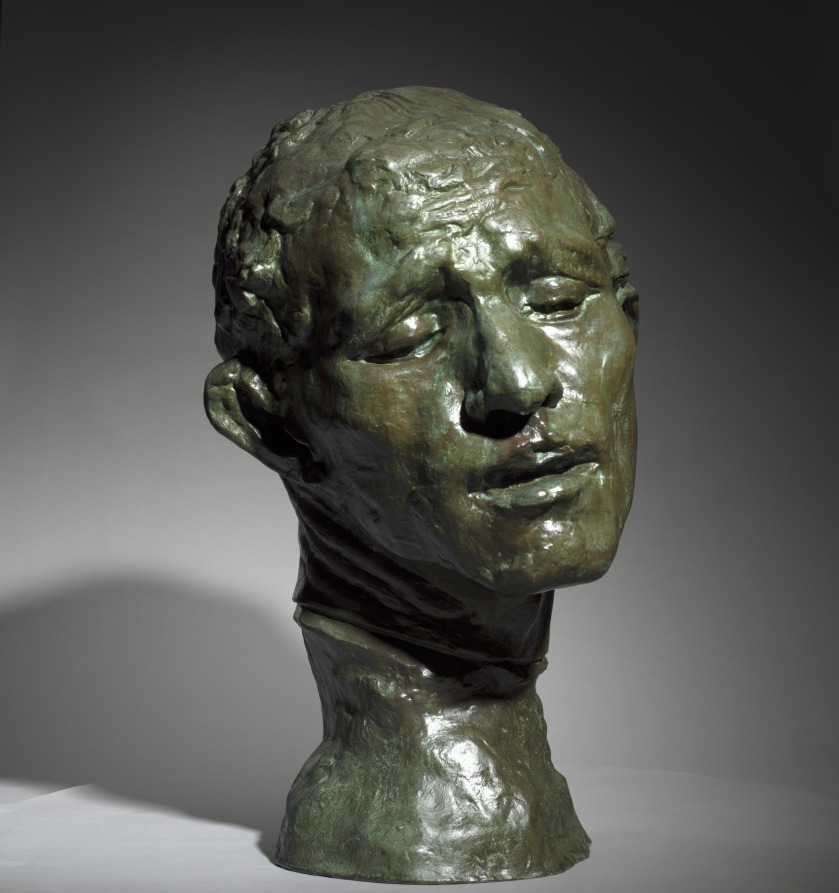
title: Heroic Head of Pierre de Wissant, One of the Burghers of Calais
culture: France, 19th century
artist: Auguste Rodin (French, 1840–1917)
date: 1886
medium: bronze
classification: Sculpture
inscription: inscribed at neck, left: A.Rodin; inscribed lower back: Alexis Rudier/Fondeur-Paris.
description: This sculpture depicts one of the figures in Rodin’s large public monument The Burghers of Calais (1884–89), featuring six French men who volunteered to be taken prisoner by the English in exchange for lifting the siege of Calais during the Hundred Years War (1337–1453). Pierre de Wissant’s anguished expression suggests extreme mental suffering as he contemplates his expected execution. Rodin exhibited a life-size version of the figure as an independent work before completing the monument. He later made multiple versions in various sizes and media.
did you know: This sculpture depicts the head of a figure from Rodin's large public monument The Burghers of Calais (1884-89). The CMA also owns a plaster version of the head.